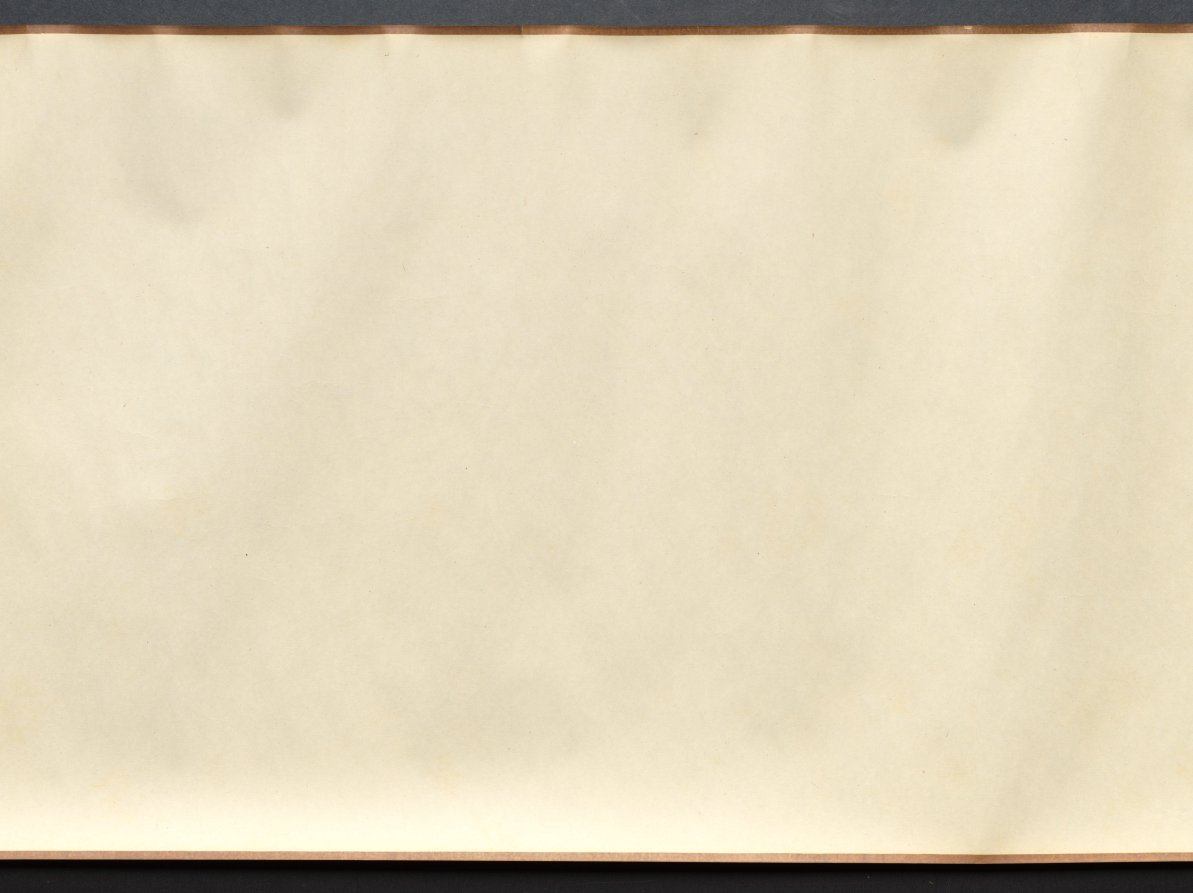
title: Returning to the Village in a Rainstorm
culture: China, Ming dynasty (1368–1644)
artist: Xie Shichen (Chinese, 1487–after 1567)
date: 1530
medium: Handscroll; ink and light color on silk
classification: Painting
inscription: 風雨歸村圖 嘉靖庚寅秋日樗仙謝時臣. [印] 謝時臣印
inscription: 3 additional seals unidentified.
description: This scroll depicts a wind- and rainswept landscape with figures in the countryside struggling against a late summer monsoon rainstorm. Such weather was familiar to residents of the lower Yangzi delta. Xie Shichen spent most of his life in the Suzhou area. Details of his career are scant, but his surviving works suggest that he made his living as a professional painter. This painting conveys drama and anecdotal observations, characteristic of Zhe school paintings, such as the one by Lü Wenying, CMA 1970.76.